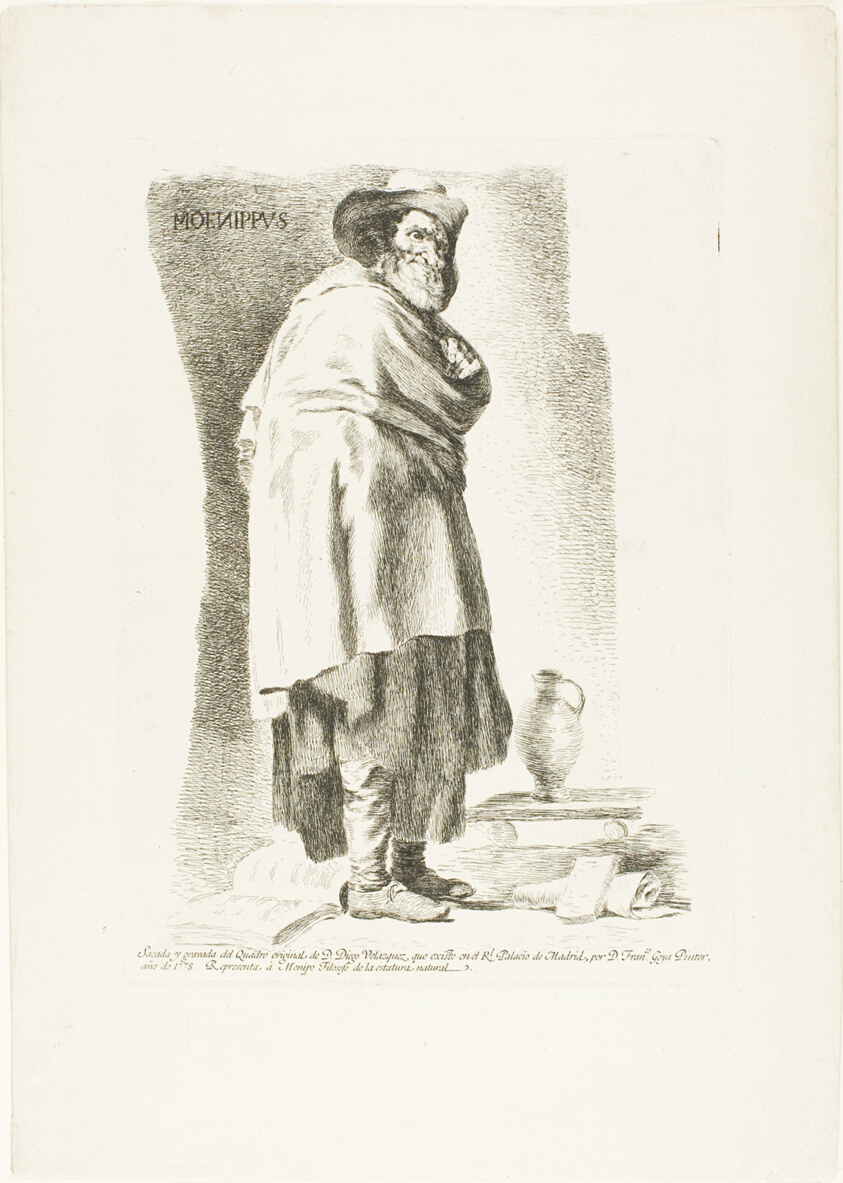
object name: Print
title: Menippus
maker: Francisco José de Goya y Lucientes (Spanish, 1746-1828); after Diego Velázquez (Spanish, 1599-1660)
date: 1778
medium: Etching with engraved inscription on laid paper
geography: Spain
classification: etching; print; prints and drawing